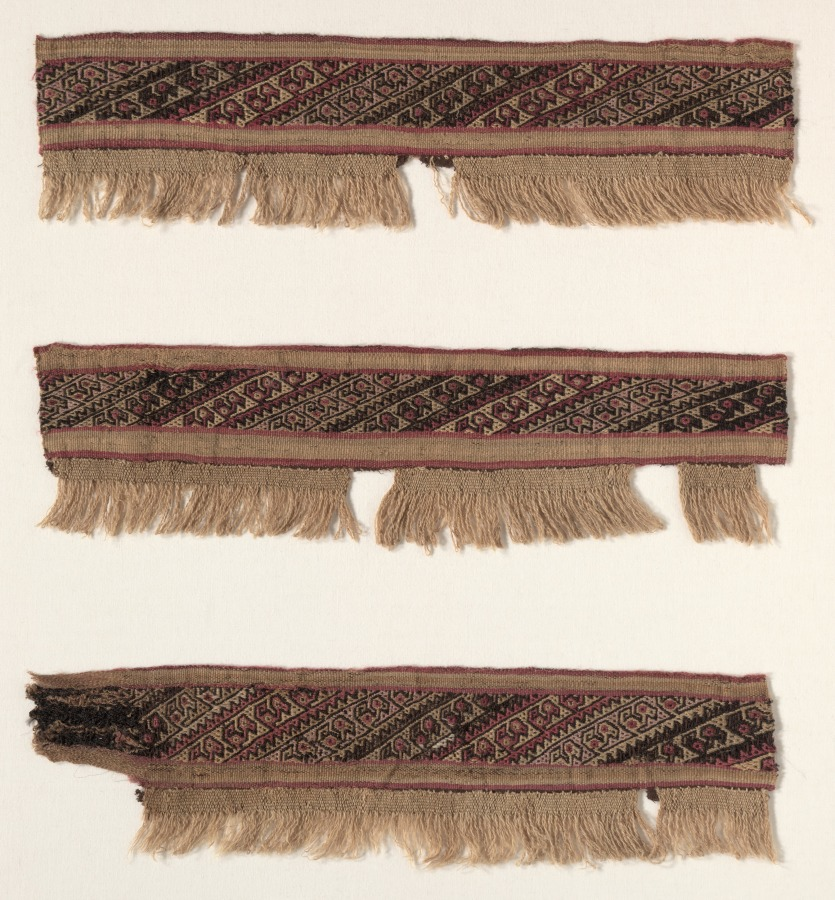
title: Three Fragments of a Border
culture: Peru, Central Coast, Chancay, 12th-15th century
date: c. 1100–1400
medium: tabby with inset border of fancy twill, brocaded; cotton and wool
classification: Textile